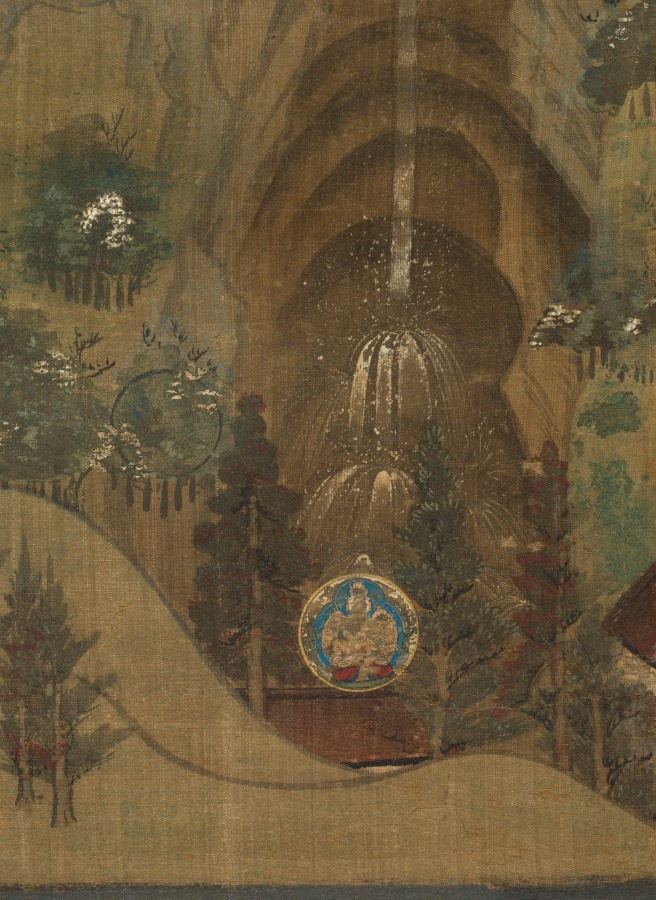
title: Mandala of the Three Shrines at Kumano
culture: Japan, Kamakura period (1185–1333) to Nanbokuchō period (1336–92)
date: 1300s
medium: hanging scroll; ink and color on silk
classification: Painting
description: This painting depicts the three shrines of Kumano from a bird’s-eye perspective, with the Buddhist counterparts of the kami of each shrine hall shown in discs directly above the halls. It also features figures, both pilgrims and deities, along the pilgrimage route and at the shrines. It is the only surviving work illustrating architectural representations of all three shrines in the same painting. They are compressed into a stacked composition, with the Nachi shrine at the top, the Shingū in the middle, and the Hongū at the bottom.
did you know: The sacred waterfall at the top right of the painting is called Nachi.